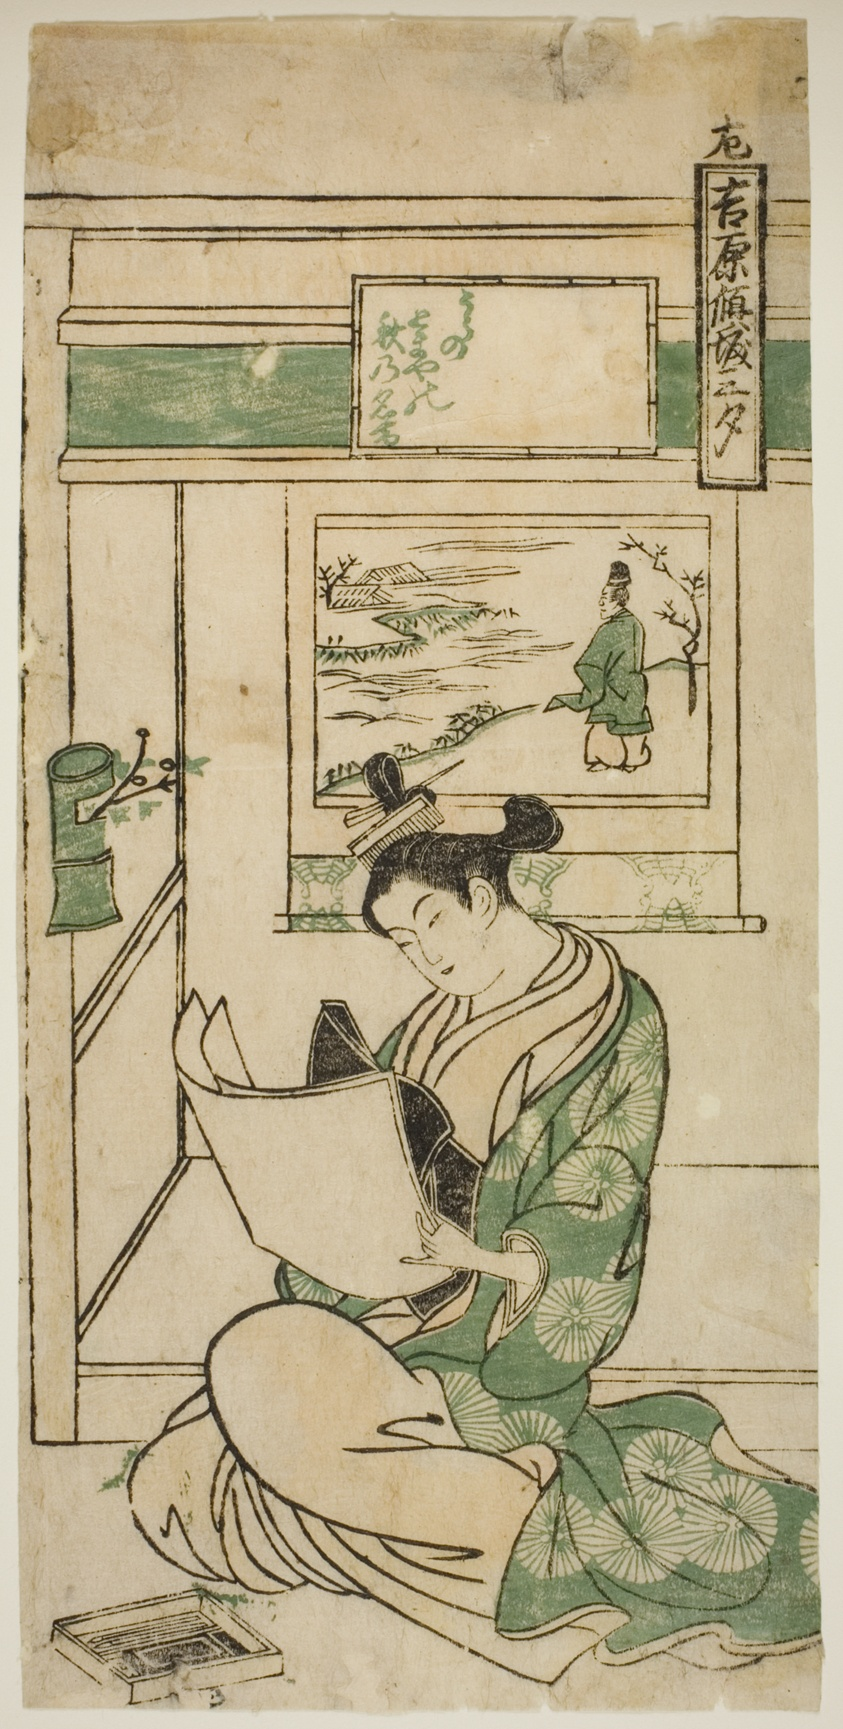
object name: Print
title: Poem by Fujiwara no Teika, from the series "Yoshiwara Courtesans in the Three Evenings (Yoshiwara keisei sanseki)"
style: Japanese (culture or style)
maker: Okumura Masanobu (Japanese, 1686-1764)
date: c. 1750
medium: Color woodblock print; left sheet of hosoban triptych, benizuri-e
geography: Japan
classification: woodblock print; print; asian art